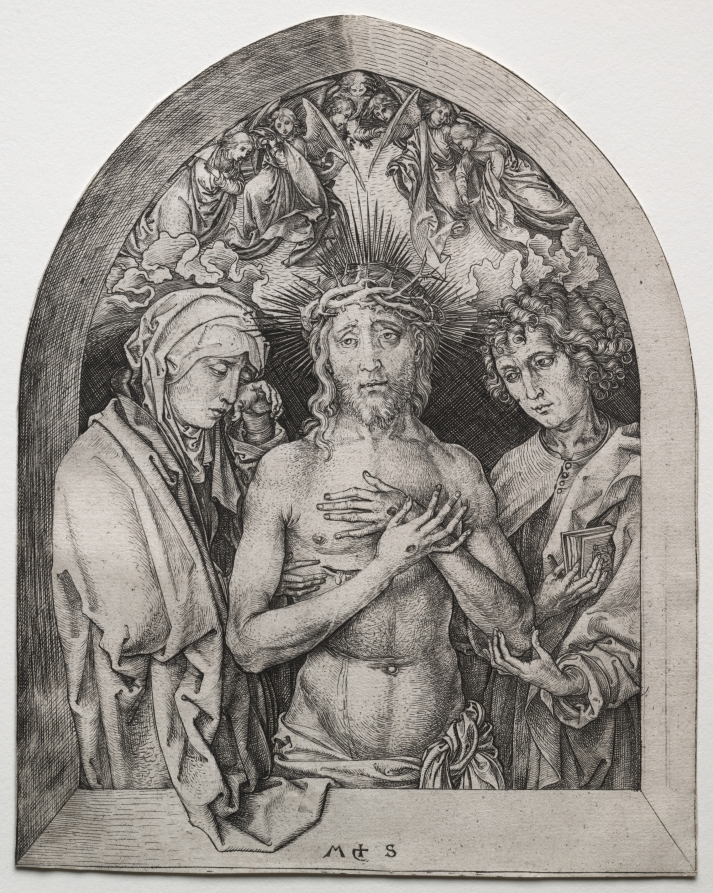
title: Christ as the Man of Sorrows between the Virgin and St. John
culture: Germany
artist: Martin Schongauer (German, c. 1450–1491)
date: 1470–75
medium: engraving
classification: Print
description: Prints of the Man of Sorrow were widely widespread in Northern Europe after the mid-15th century. The image portrays Christ naked above the waist, wearing the crown of thorns, and displaying the wounds of the Passion marking his hands and side. The Virgin Mary and Saint John the Evangelist flank Christ and mourn his death. Images like these functioned as devotional tools meant to help the faithful to meditate on the Lord's suffering. By showing Christ's hand over his chest and the Virgin's hand on his side, he focused the viewer's attention on Christ's wounds. Similarly, Saint John's compassionate gaze provides a model of empathy for the beholder.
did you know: The Virgin's garment gently intrudes into the space of the viewer, as if to invite the beholder to participate more closely in this scene of compassion.